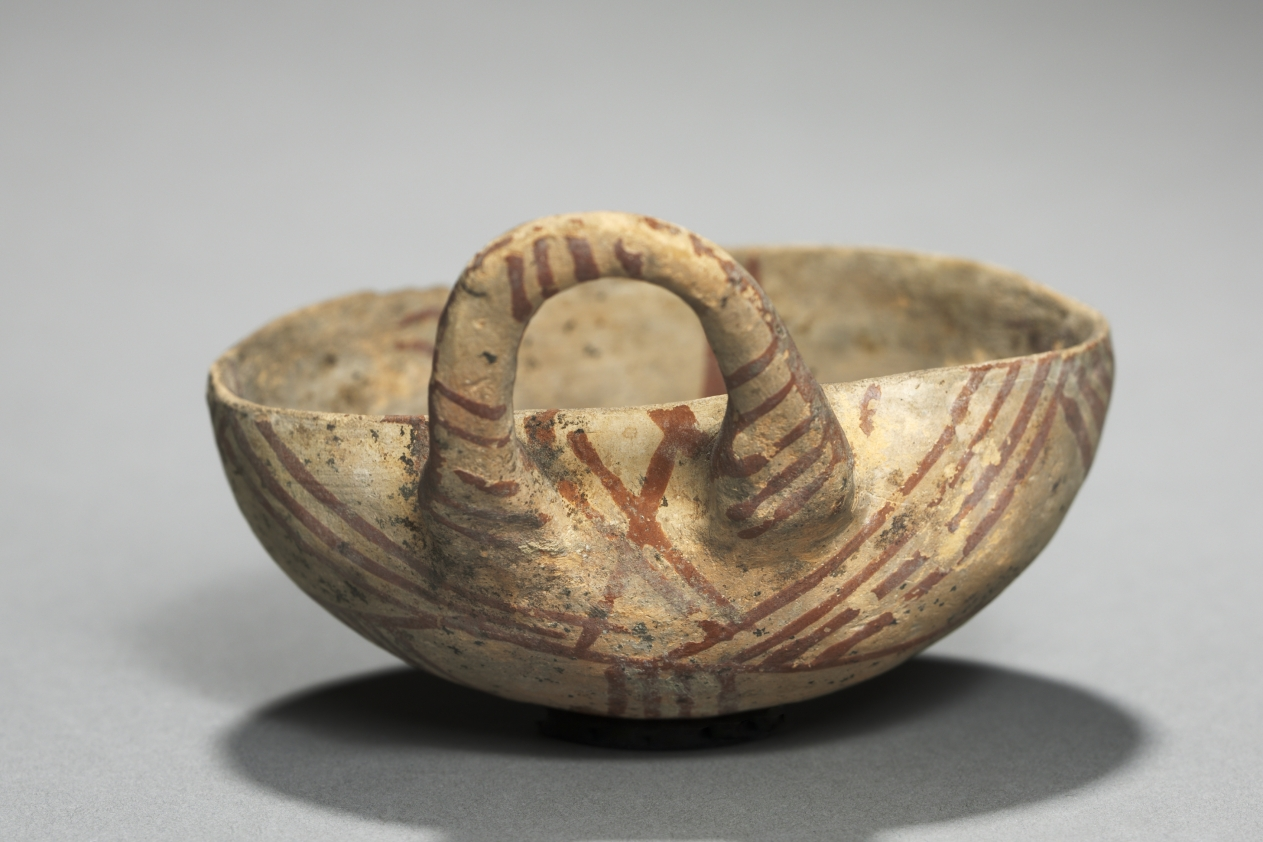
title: One-Handled Bowl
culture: Cyprus, middle Cypriot III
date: c. 1725–1600 BCE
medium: white painted ware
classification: Ceramic